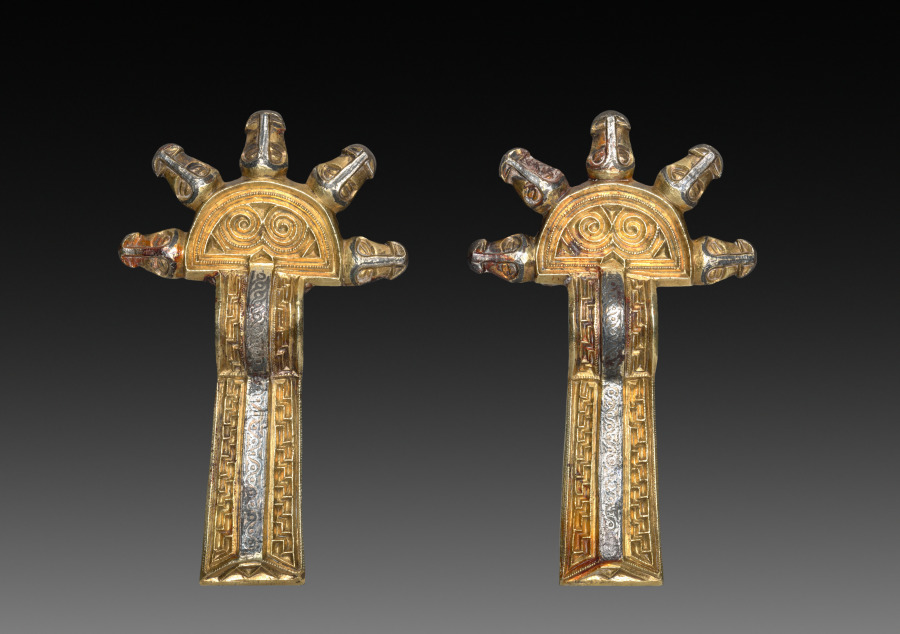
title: Pair of Fibulae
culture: Alemannic, Migration Period, 6th-7th century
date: 500s-600s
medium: cast silver, parcel-gilt, with niello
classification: Jewelry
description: A woman of high rank might have worn these twin fibulae on her shoulders, one fastening her inner garment on the right, the other her outer garment on the left. She might also have suspended them from her belt as decorative ornaments.